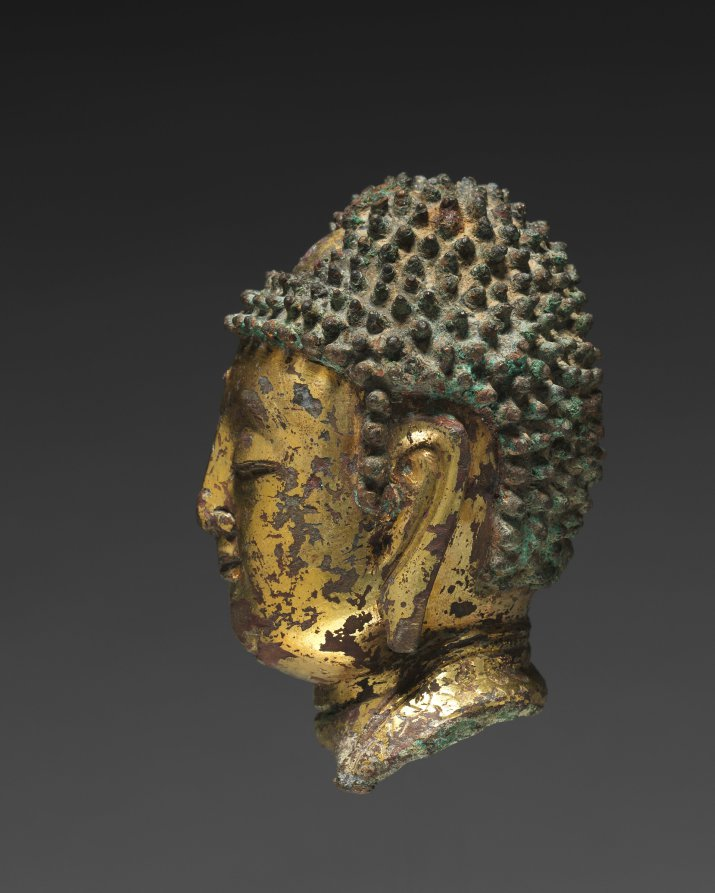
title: Head of Buddha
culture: Korea, Goryeo dynasty (918–1392)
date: 900s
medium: gilt bronze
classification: Sculpture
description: While large Buddhist statues were made mostly in stone during the Goryeo period (918–1392), small ones were made in gilt bronze, as a portable object of devotion by traveling Buddhist monks.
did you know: A gentle smile crossing the Buddha's face here is a sign of compassion.